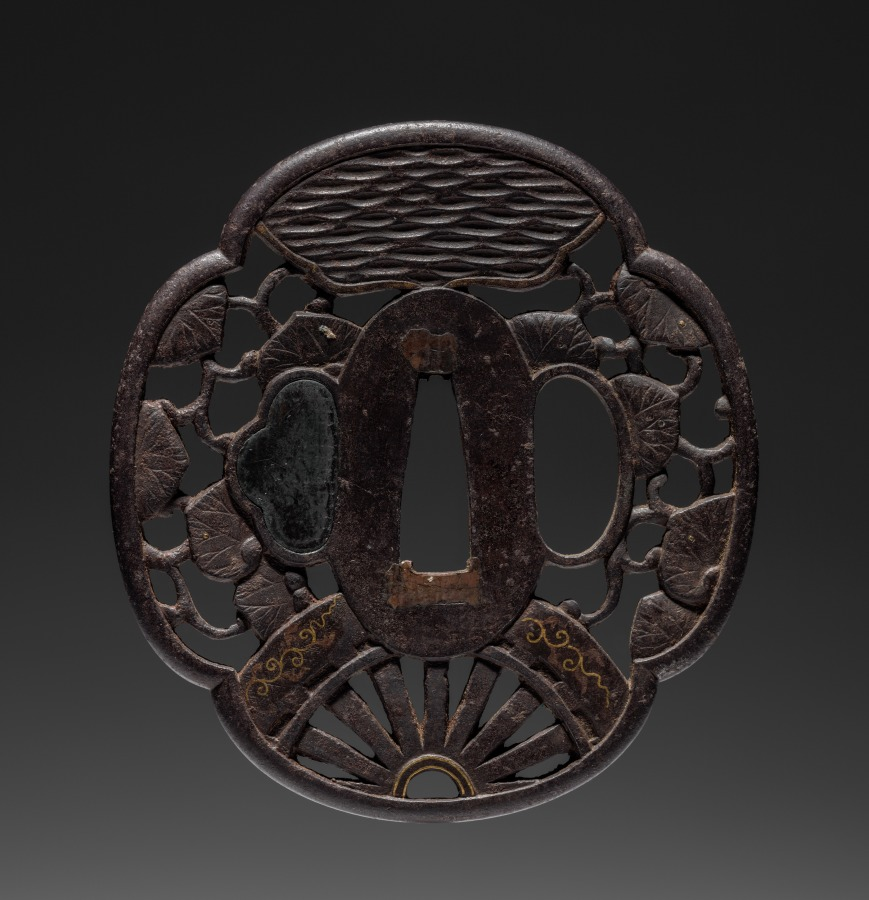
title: Sword Guard (Tsuba) with Aoi (Heartvine) Chapter of The Tale of Genji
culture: Japan, possibly Edo period (1615-1868)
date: c. 1615–1868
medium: iron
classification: Arms and Armor